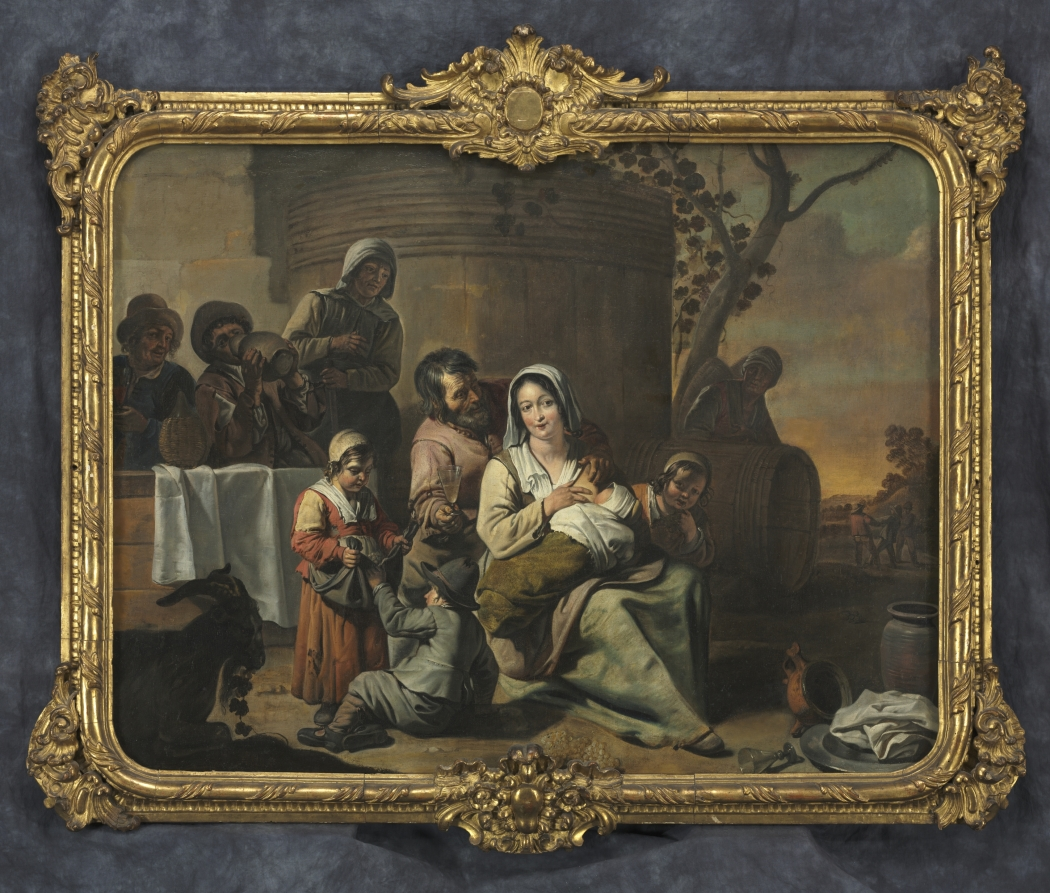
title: Vintage Scene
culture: France, 17th century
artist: circle of Le Nain (French)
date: 1650s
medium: oil on canvas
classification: Painting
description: The mid-17th century saw revived interest in representations of the lower classes. Artists like the Le Nain brothers in France painted scenes that looked back to the Renaissance tradition of pastoral imagery. The Le Nain often depicted ordinary country folk going about their daily business, subjects and figures they remembered from their childhood in rural Laon. Considered a companion piece to Peasant Children Dancing (1958.175.2), Vintage Scene has also been attributed to the Master of the Béguins, a Flemish artist who worked in the manner of the Le Nain in Paris. Here, good-natured though bawdy men drink in the background shade, while a sweet-faced young woman in the center surrounded by chubby children flashes the viewer a coy smile that reveals her awareness of the slowly creeping hand of her drunk companion. While peasants drinking was a popular subject among Flemish artists, the theme of wine connects the subject with the grape harvest, which recalls the Le Nain's agricultural homeland in France. This use of both aesthetic and biographical aspects of the Le Nain's lives demonstrates the Master of Béguins's ability to absorb the stylistic and thematic lessons of the famous brothers.